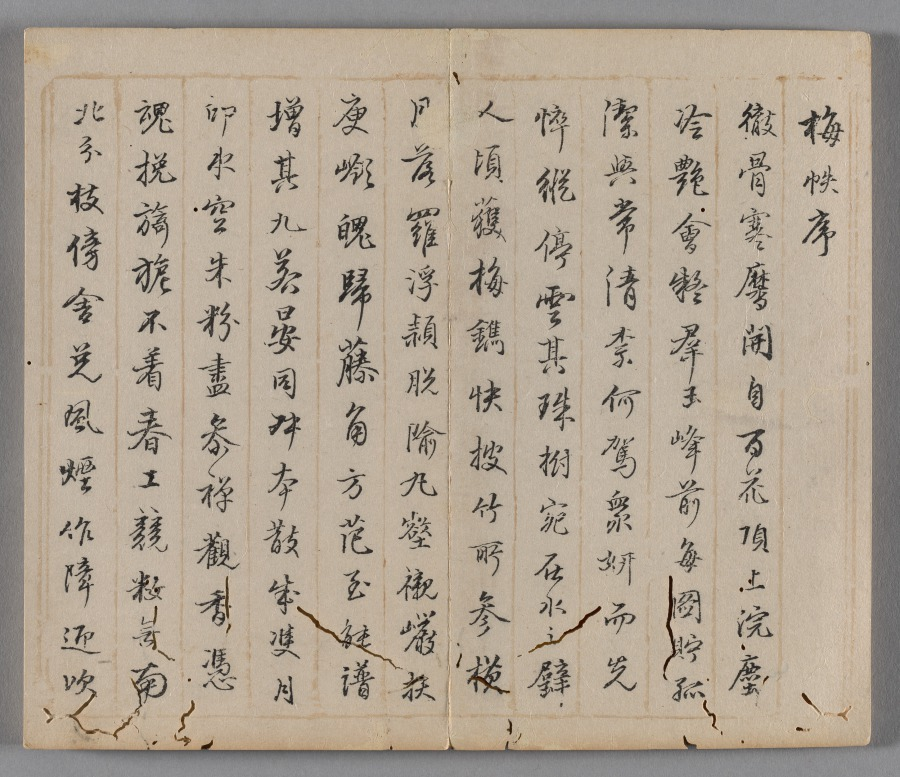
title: Ten Bamboo Studio Painting and Calligraphy Handbook (Shizhuzhai shuhua pu): Plum Blossoms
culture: China, Qing dynasty (1644-1911)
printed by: Hu Zhengyan (Chinese, c. 1584–1674)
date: 1633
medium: Woodblock-printed book; ink and colors on paper; first edition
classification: Print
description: Color printing reached a level of perfection in the early 1600s, as seen in this Ten Bamboo Studio Collection of Calligraphy and Painting and the Mustard Seed Garden Manual of Painting (printed 1679 and 1701). The painterly quality, precision in registering (aligning) the woodblocks, and harmonious colors made them the most successful color print editions in Chinese history. Both editions were printed and compiled in Nanjing, spread nationwide, and had a great impact on the arts in Japan and Korea.